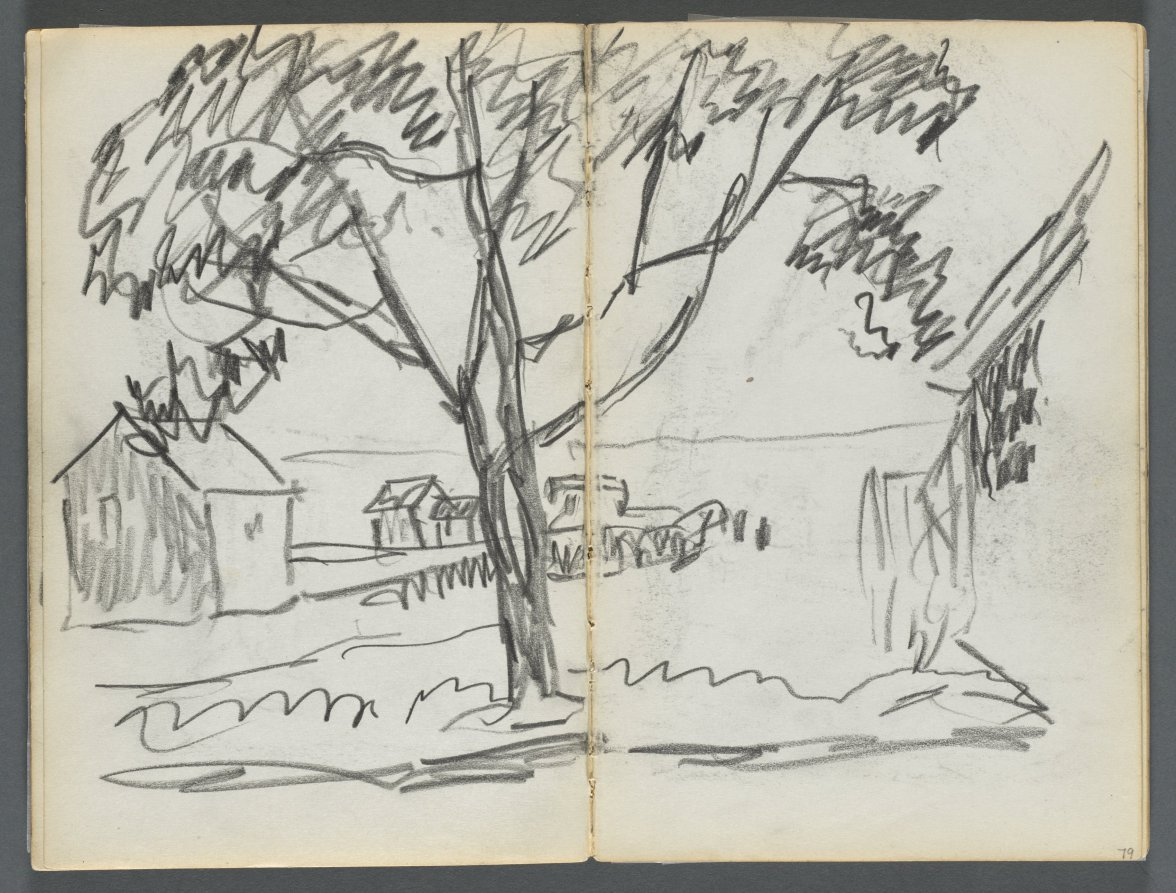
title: Sketchbook, The Dells, N° 127, page 078 & 79: Landscape with Houses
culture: America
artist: Maurice Prendergast (American, born Newfoundland [now Canada], 1858–1924)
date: c. 1919–1921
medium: graphite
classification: Bound Volume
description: This sketchbook contains 59 pages of graphite drawings and 16 watercolors made at various locations on Cape Ann, Massachusetts.